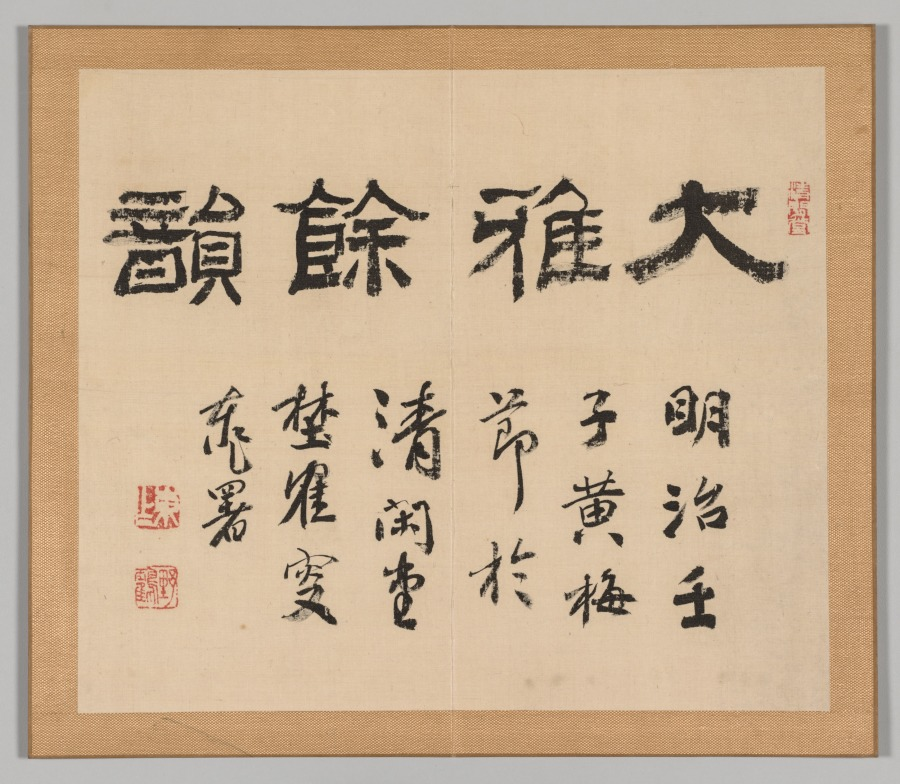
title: Title from "Reverberations of Taiga"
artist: Aoki Shukuya (Japanese, d. 1802)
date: 1912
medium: double-leaf from a pair of albums; ink on silk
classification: Portfolio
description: Kusakabe Meikaku, one of the three most famous Japanese calligraphers of his time, provided a title leaf for a pair of albums of paintings after Ike Taiga (池大雅) (1723–1776) by his student Aoki Shukuya (青木夙夜) (died 1802). Murata Kōkoku, a well-traveled painter with an extensive network of colleagues in China and Japan, wrote a postscript, CMA 1979.73.2.36, for the albums in which he explained that the paintings are faithful copies after Taiga’s images of rocks, mountains, residences, and so forth. These two artists respectfully documented Shukuya’s work more than 100 years after his death.